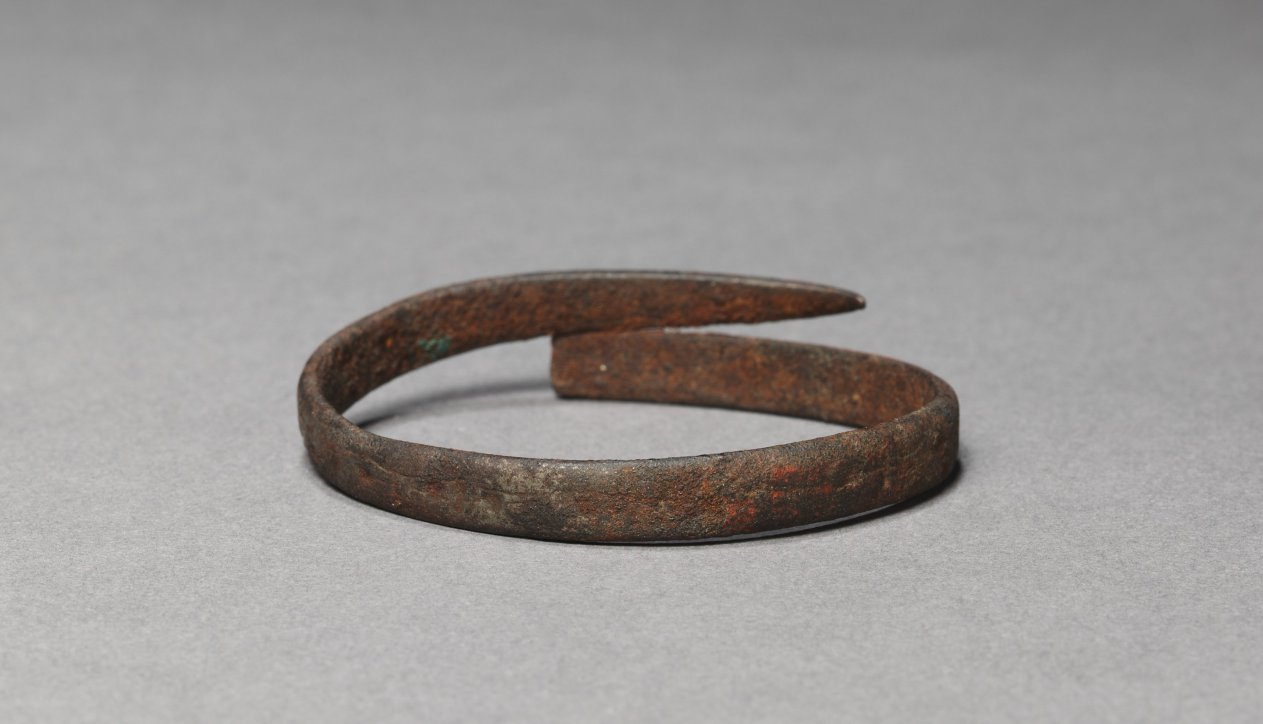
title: Bracelet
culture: Egypt, Greco-Roman period (332 BCE–395 CE), Roman empire (30 BCE–395 CE)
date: 200–400 CE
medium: iron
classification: Jewelry